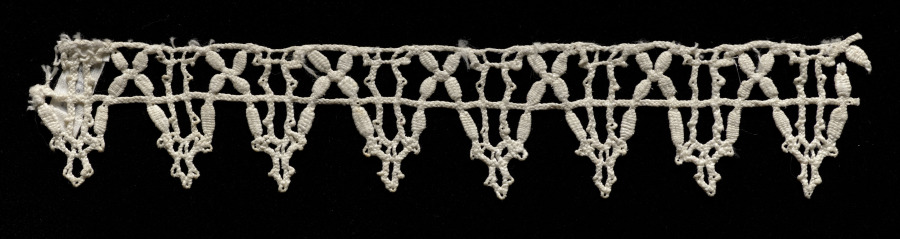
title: Lace Insertion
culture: Italy, Genoa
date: 1600s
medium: Bobbin lace (needle lace design)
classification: Lace